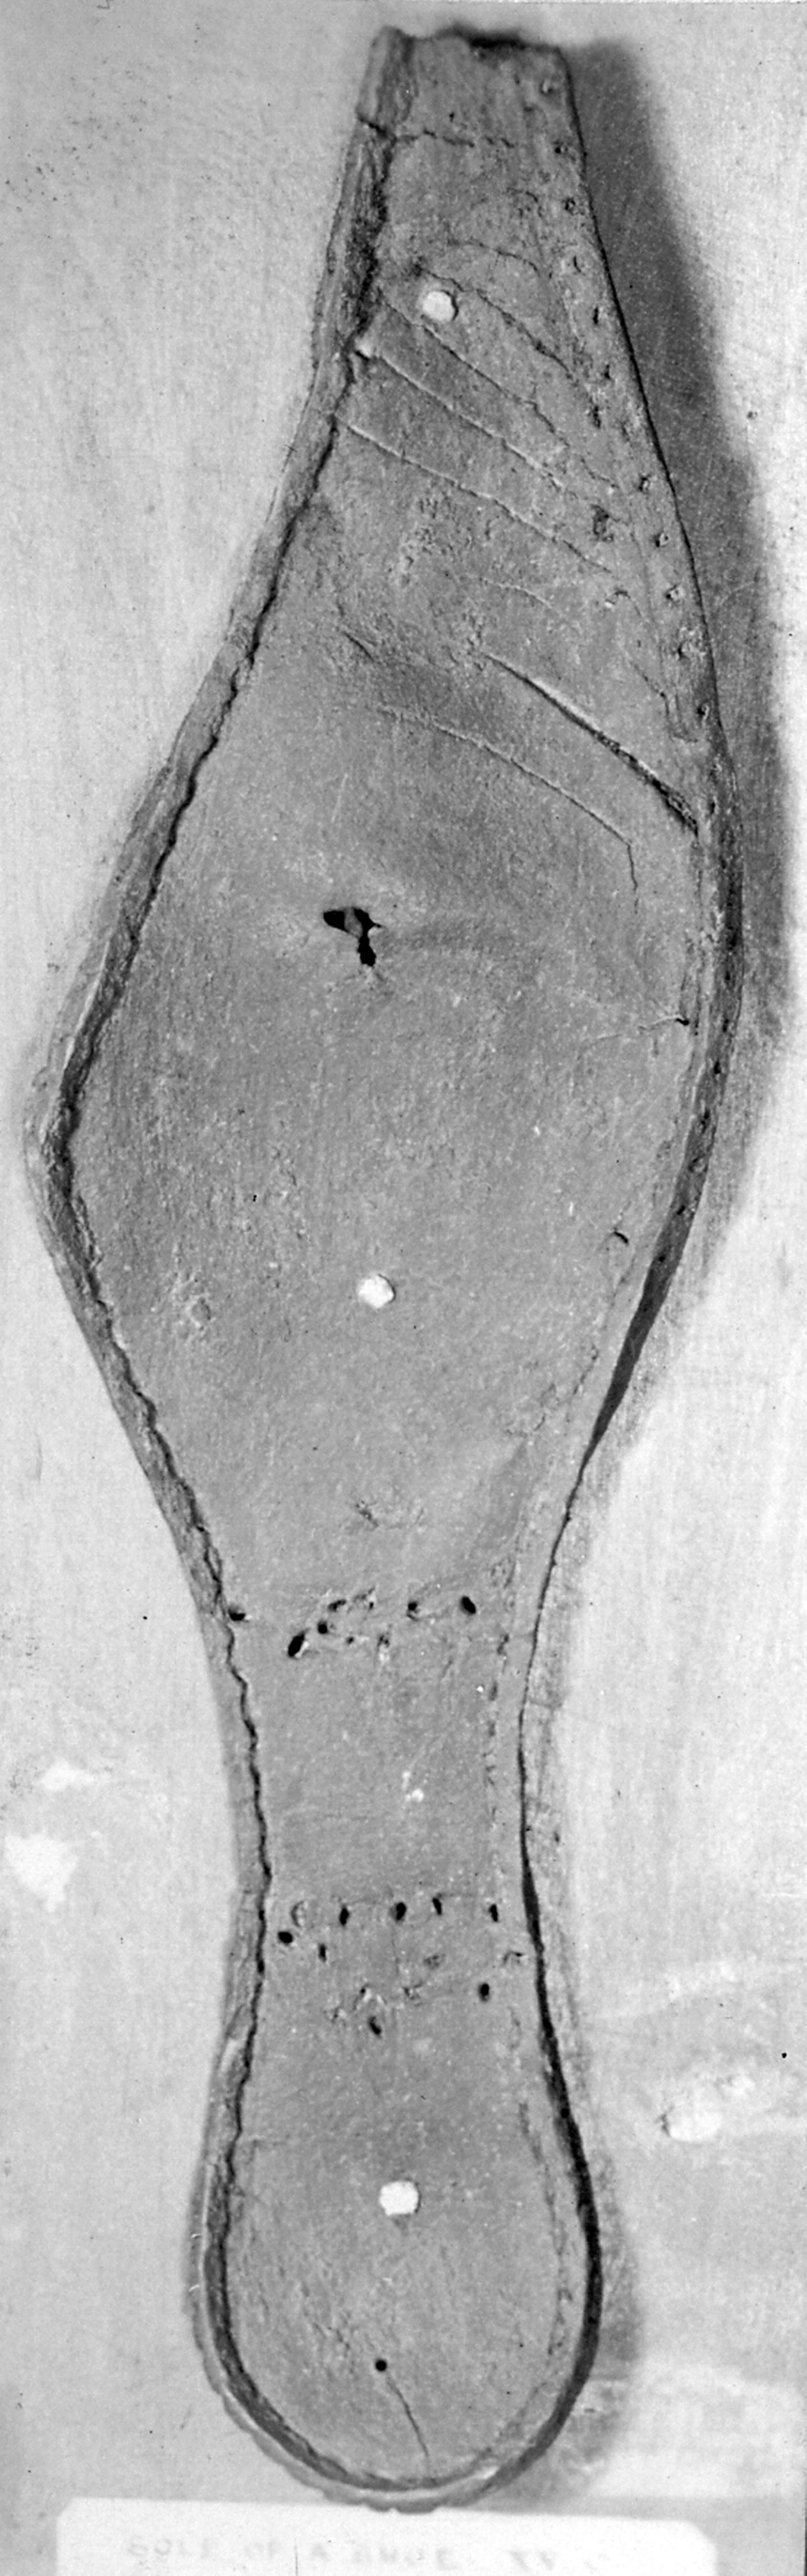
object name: Textile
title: Sole of a Shoe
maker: England; Found at London Wall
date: c. 1460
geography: England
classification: textile; costume accessory - shoe; shoes - misc; costume; dress (garment); clothing